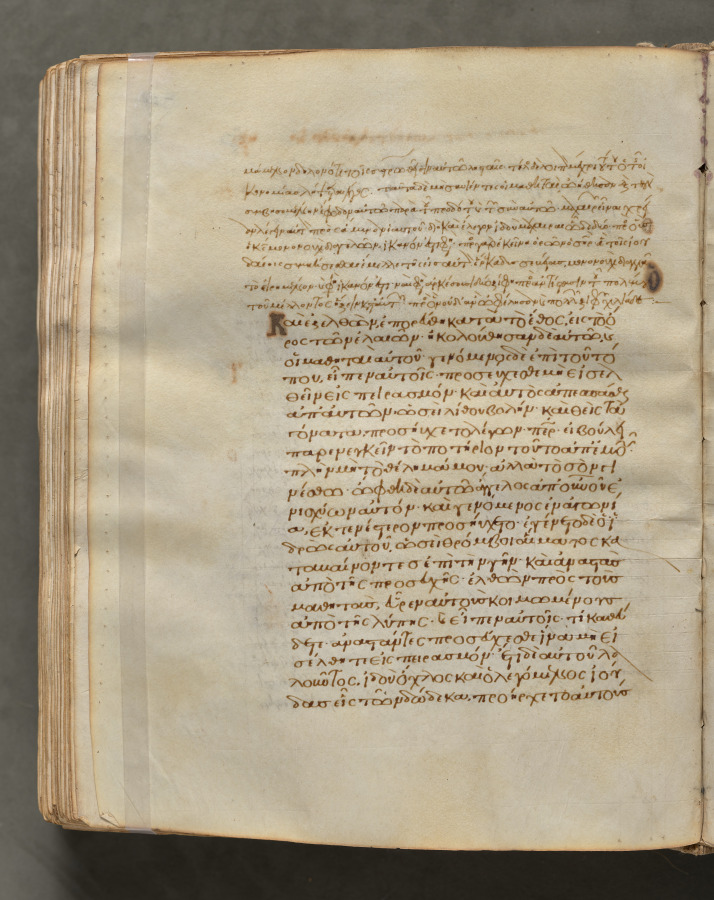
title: Text, folio 310 (verso), from a Gospel Book with Commentaries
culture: Byzantium, Constantinople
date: c. 1000–1100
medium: ink, tempera, and gold on vellum; leather binding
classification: Bound Volume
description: Each of the four gospels in this book opens on a page with brilliantly illuminated borders depicting the author of the text as well as birds—principally peacocks, symbols of the immortality of the soul—and fountains, representing the fountain of life and the salvation of the soul. This volume consists of 428 leaves with texts in Greek. Its level of sophistication suggests that it was probably written and decorated in a monastery in Constantinople.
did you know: Gospel books were carried in procession through Byzantine churches.